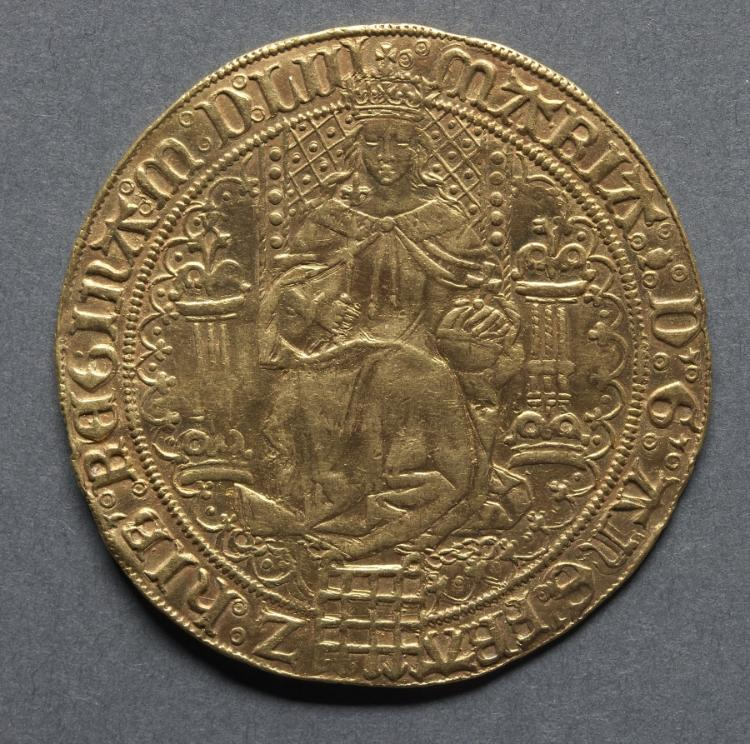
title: Sovereign: Mary Enthroned (obverse)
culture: England, Mary, 1553-1554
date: 1553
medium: gold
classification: Coins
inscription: MARIA: D': G': ANG'. FRA Z: HIB': REGINA: m:D:LIII